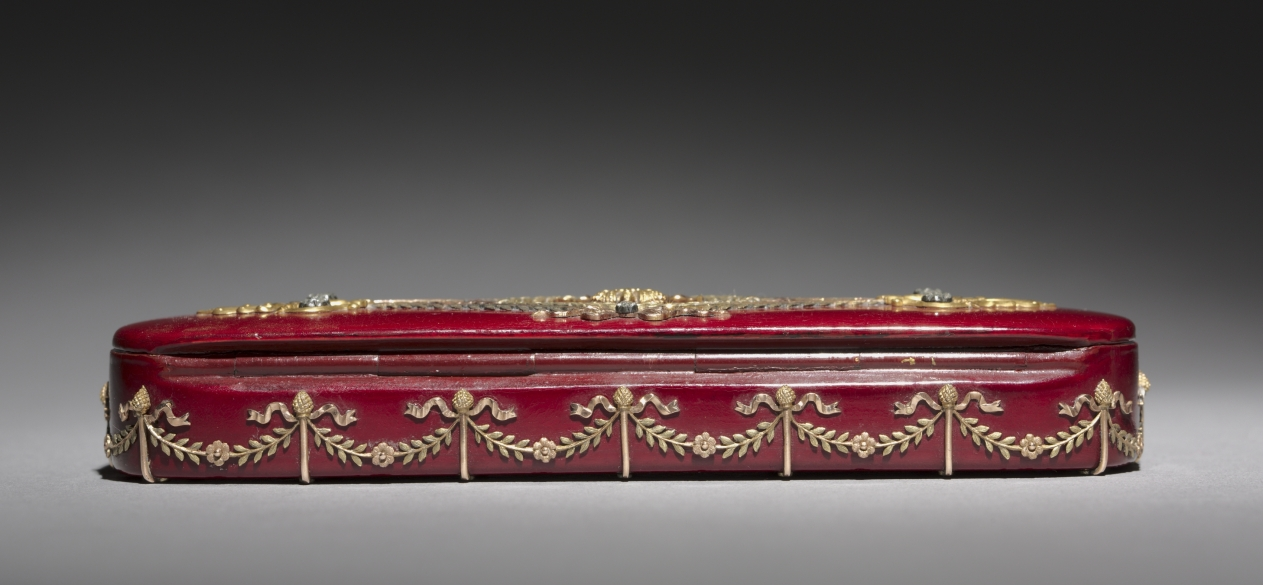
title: Lacquer Box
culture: Russia, St. Petersburg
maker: House of Fabergé (Russian, 1842–1918)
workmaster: Factory N. Lukutin (Russian)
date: c. 1890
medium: lacquer, papier-mâché, gold, diamonds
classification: Miscellaneous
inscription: inscribed (inside cover): Factory N. Lukutine (in Cyrillic script in gold); three double-headed eagles in gold.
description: This lacquer box was created by the Lukutin Factory, which was well known for creating boxes such as this one after Piotr Lukutin took charge of production and expanded the factory to include tea caddies and various desk accessories. This particular box from the Lukutin workshop is remarkable in its detailed gold patterns and diamond inlays that create an intentional contrast with the deep red surface.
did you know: Piotr Lukutin’s workshop employed over 50 skilled painters as well as acted as a school for training apprentices.